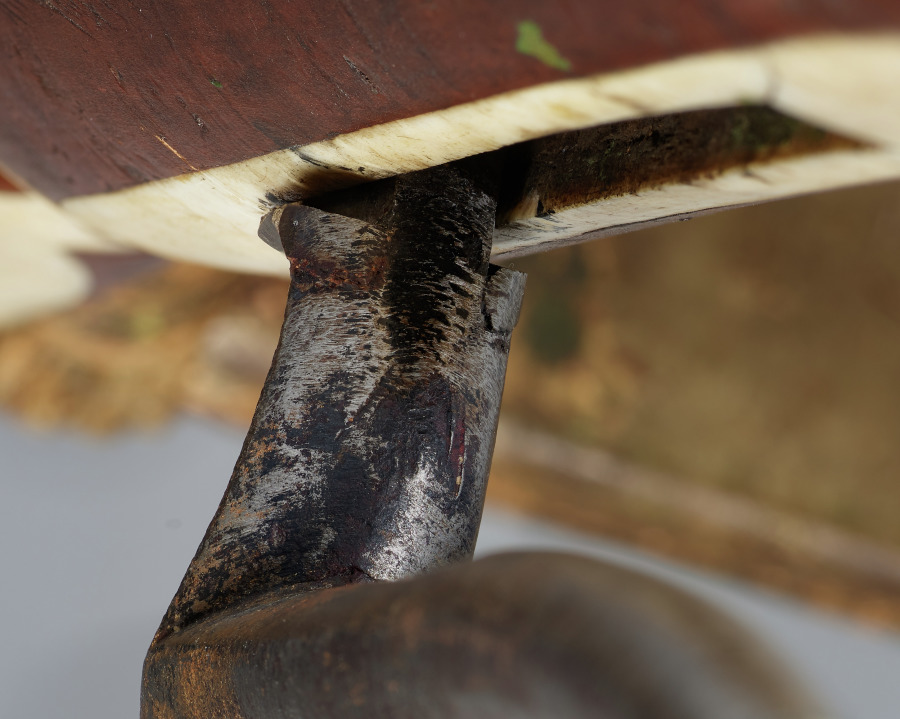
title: Crossbow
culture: Germany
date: c. 1460–70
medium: wood (walnut?) inlaid with bone; horn; iron and steel; composite bow (horn and parchment)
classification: Arms and Armor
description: The cranequin, or winding device sitting on top of the crossbow, made it easier to span for reloading. With a full quiver, a container for bolts and arrows, a hunter could bring home plenty of meat.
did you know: In every army in Europe crossbowmen were considered an elite corps, and as such occupied the central position in battle formations.